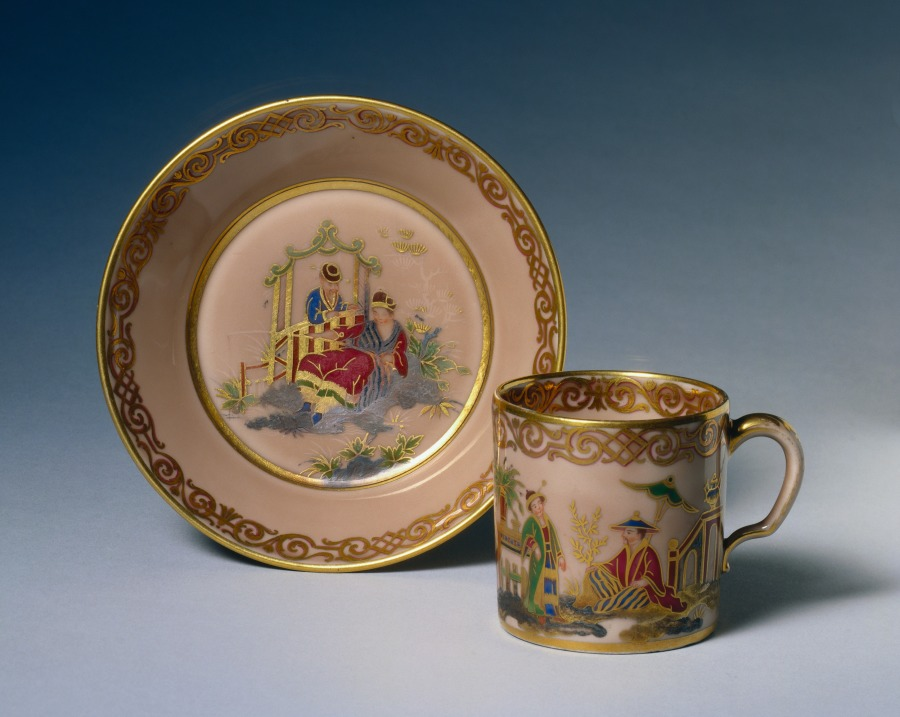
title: Cup and Saucer (Gobelet litron et soucoupe)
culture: France, Sèvres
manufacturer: Sèvres Porcelain Factory (French, est. 1756)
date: 1778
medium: hard-paste porcelain with overglaze enamel decoration and gilt and silver decoration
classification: Ceramic